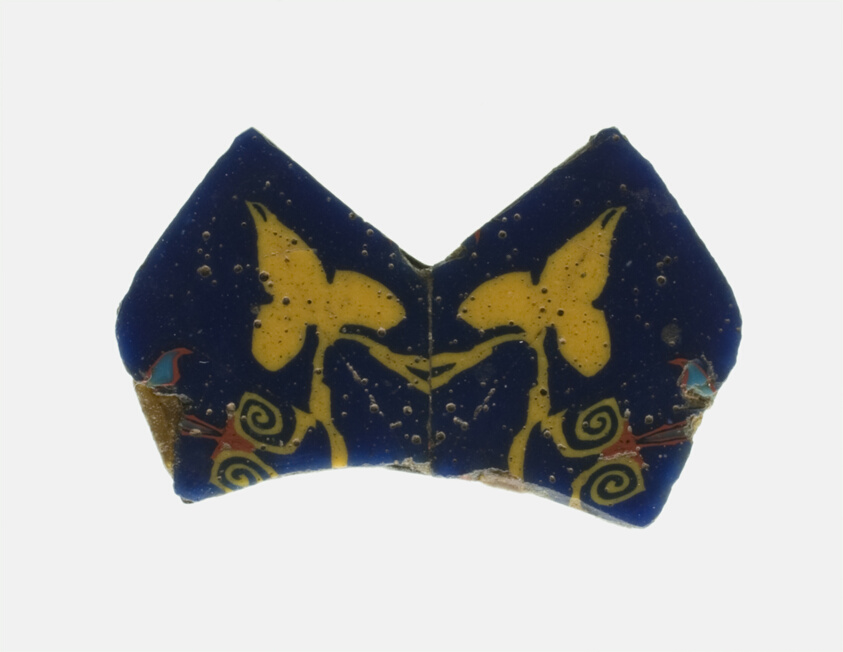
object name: Decorative Arts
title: Fragment of a Floral Inlay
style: ancient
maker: Egyptian or Roman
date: Ptolemaic Period–Roman Period, (1st century BCE–1st century CE)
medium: Glass, mosaic technique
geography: Italy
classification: glass; inlay; ancient art; decorative arts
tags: floral